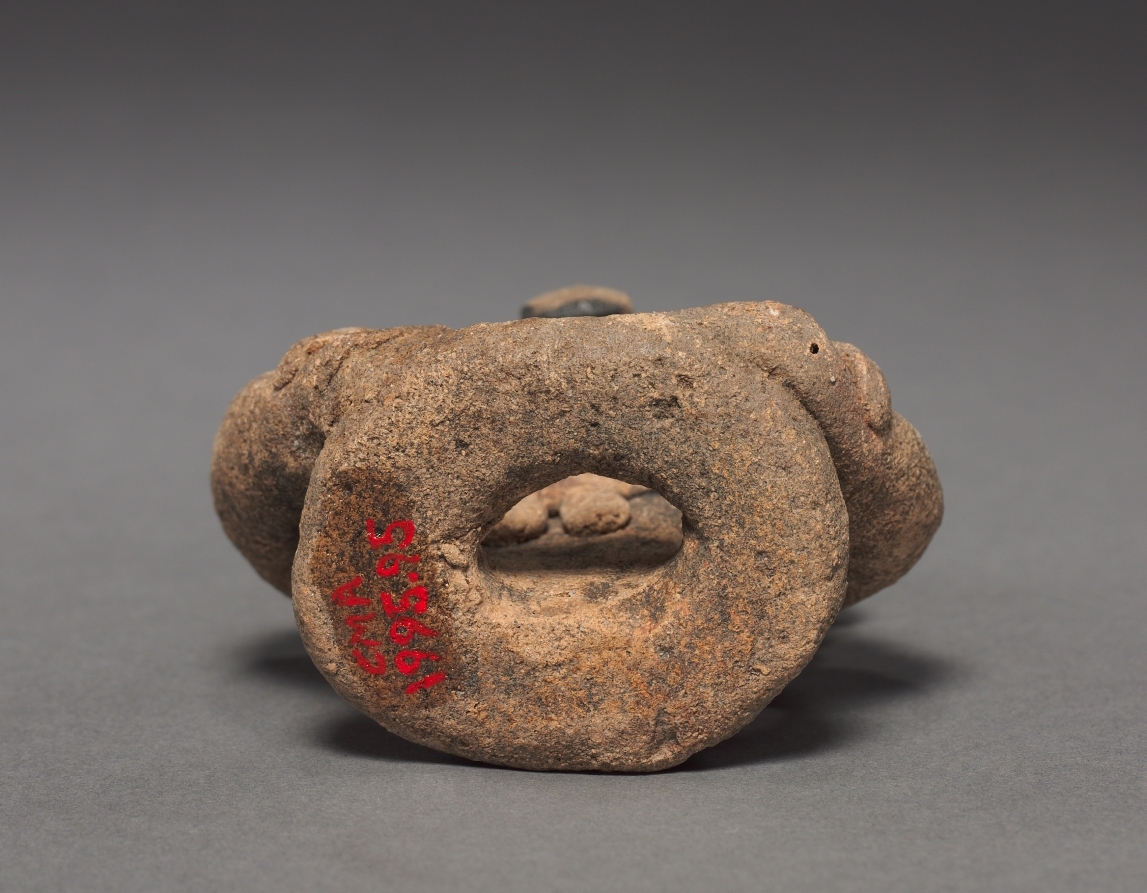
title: Seated Figurine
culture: Mexico, Veracruz, Remojadas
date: c. 150–1 BCE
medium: earthenware with asphalt paint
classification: Sculpture